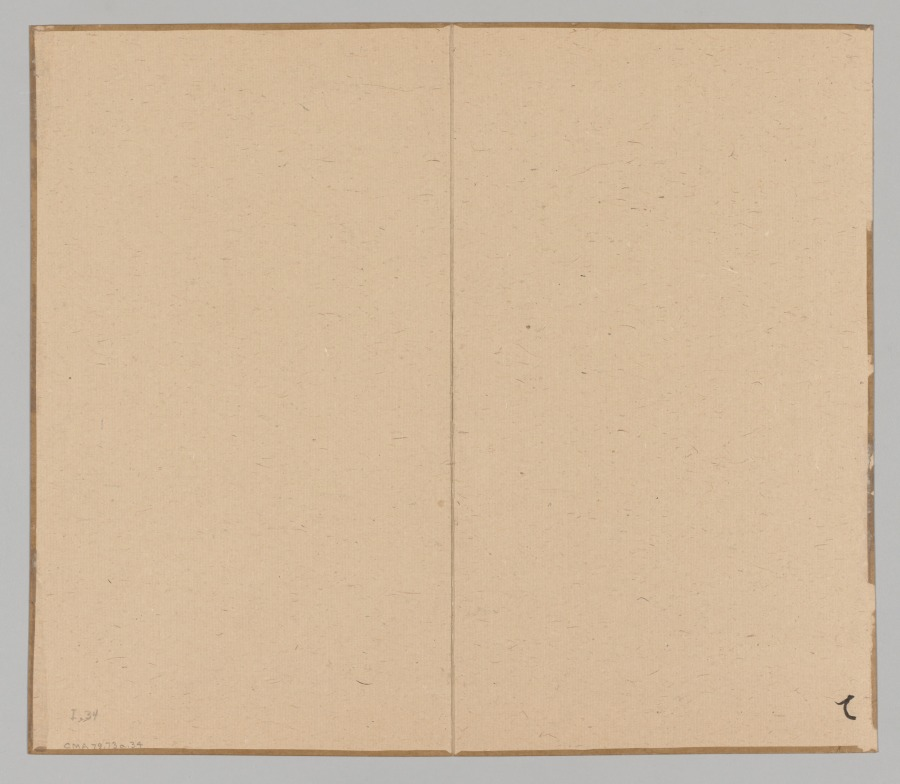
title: Reverberations of Taiga, Volume 1 (leaf 34)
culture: Japan, Edo period (1615–1868)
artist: Aoki Shukuya (Japanese, d. 1802)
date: mid- to late 1700s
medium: double-leaf from a pair of albums; ink and light color on paper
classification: Portfolio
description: Traditionally, young painters in Japan began their studies with an established master-painter. The master's compositions invariably became models that the apprentice copied to learn various ink and brush techniques. Shukuya was a pupil of the famous Kyoto artist Ikeno Taiga, whose style is reflected in these sketches of rocks, trees, and mountains.